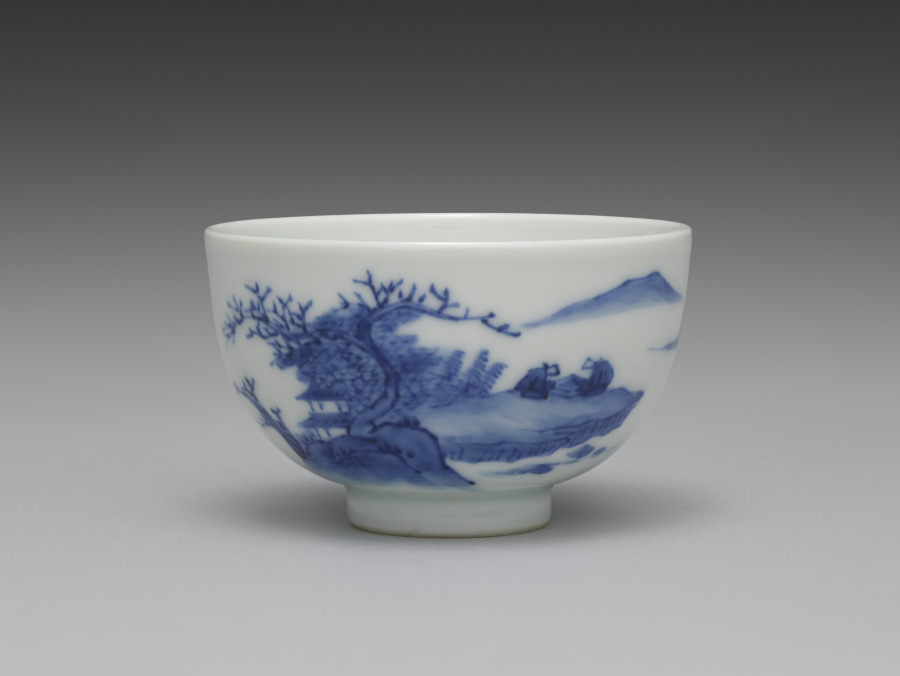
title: Teacup from Tea Set with Chinese Landscape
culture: Japan, Meiji period (1868–1912)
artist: Seifū Yohei III (Japanese, 1851–1914)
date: 1893–1914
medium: Porcelain with underglaze blue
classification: Ceramic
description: The theme of this sencha tea set is the Chinese scholar-recluse in an idyllic landscape. Each of the five teacups has a landscape with an architectural structure and some human activity. This tea set has a side-handled pot called a kyūsu, used for steeping, straining, and serving tea. Unlike some others, this set also has a yuzamashi, a container used to cool boiled water to just the right temperature for the best flavor when steeping. Seifū Yohei III’s painting teacher, Tanomura Chokunyū (1814–1907), made a visual record of famous sencha events that shows how these kinds of porcelains fit with objects such as a stove and kettle to form a complete set of utensils for tea preparation, and with ensembles of decorative objects meant to inspire creativity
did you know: This cup shows a man rowing a little skiff, which disturbs the otherwise still water. Behind him in the distance is an open-air pavilion. He is making his way toward a pair of figures playing a board game, much like the scene on the teapot. Down the hill from them is a residence; beyond this, a flock of geese approaches through the sky.